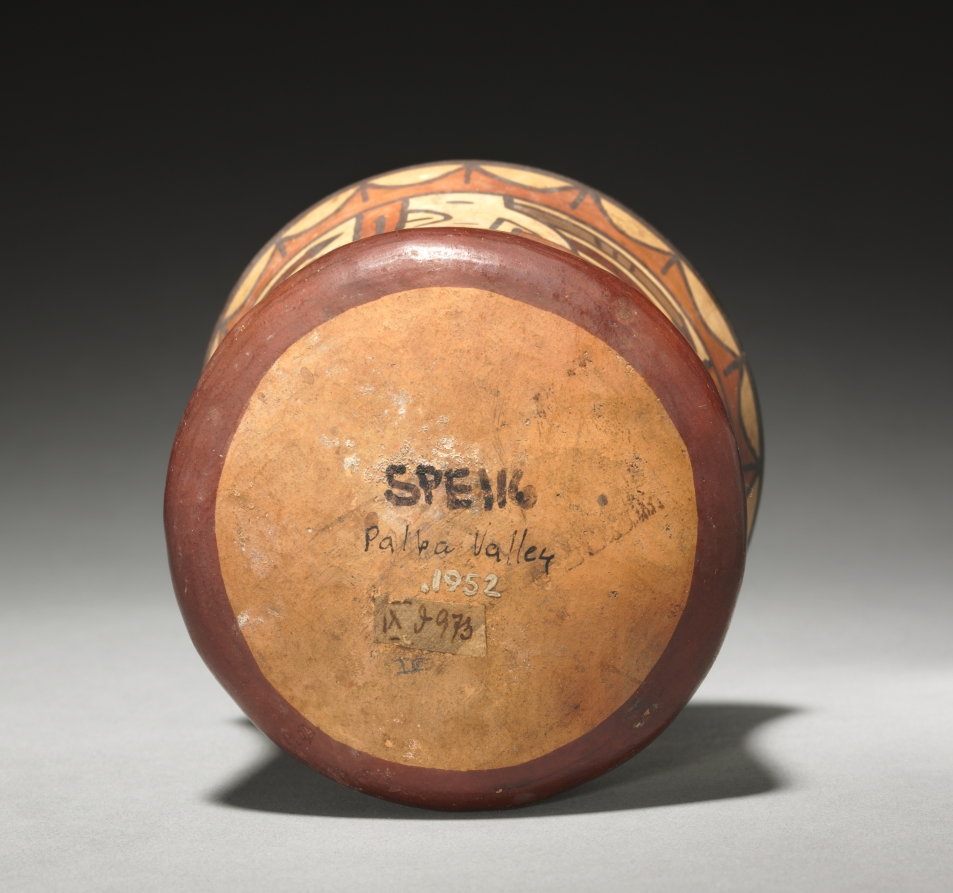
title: Bowl with Trophy Heads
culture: Peru, Nasca, Early Intermediate Period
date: c. 100–650 CE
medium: ceramic, slip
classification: Ceramic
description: Nasca is one of the two major cultures and ceramic styles of its periods, and one of the finest ceramic styles ever produced in the South American Andes. Vessel walls are thin, firing temperatures higher than in earlier times, and a variety of warm, earthen-toned slips come into use. This small bowl features repetitions of human trophy heads—a major Nasca motif that refers both to war and fertility.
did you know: Two important themes in Nasca art are war and fertility.